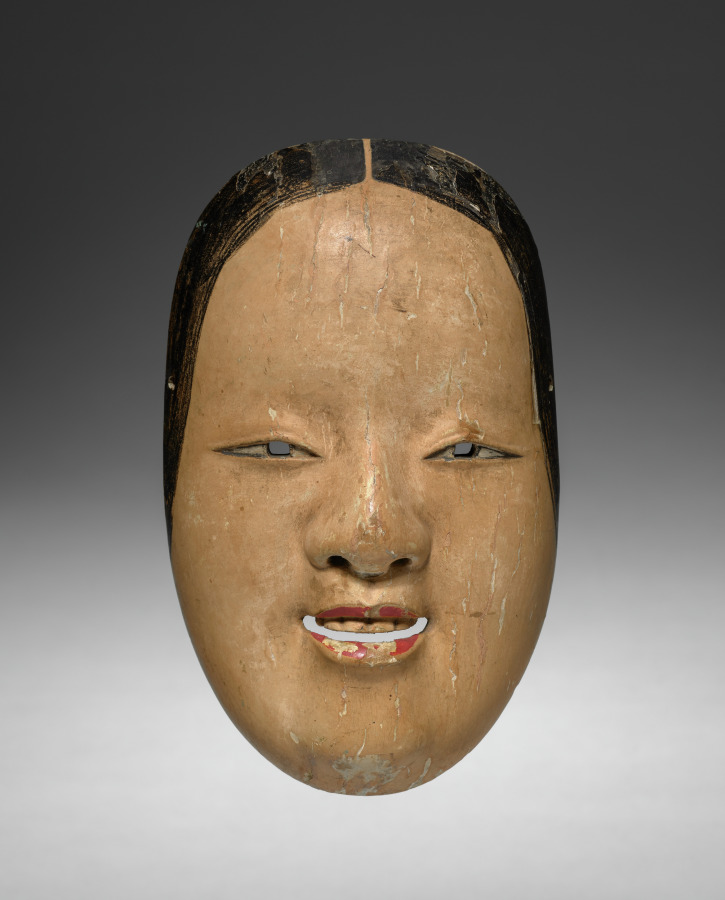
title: Noh Mask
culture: Japan, Edo period (1615–1868)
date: c 1700s- 1868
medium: carved wood, pigment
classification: Wood